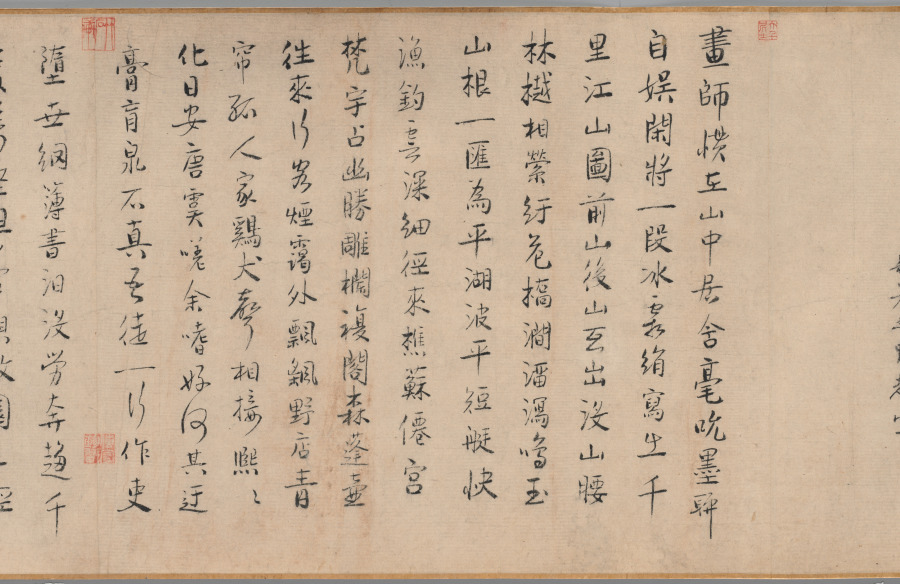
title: Streams and Mountains without End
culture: China, late Northern Song dynasty (960-1127) - Jin dynasty (1115-1234)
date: 1100–1150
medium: handscroll; ink and slight color on silk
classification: Painting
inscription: 9 colophons and 48 seals: 1 colophon, dated 1205, of Wang Wenwei 王文蔚 (dates unknown); 1 colophon, dated 1205, of Li Hui 李惠 (dates unknown); 1 colophon of Weiluo Tian Xie 蔚羅田獬 (dates unknown); 1 colophon, dated 1214, of He Yan 何言 (dates unknown); 1 colophon, dated 1326, of Cao Yuanyong 曹元用 (d. 1329) 1 colophon, dated 1332, of Kangli Zishan 康里子山 (Naonao; 1295-1345); 1 colophon, dated 1336, of Liu Zai 劉載. (dates unknown); 1 colophon, dated 1380, and 4 seals of Yang Mao 楊懋 (1300-after 1380); 4 seals of the Hou family (ca. 1340); 1 colophon of Wang Duo 王鐸 (1592-1652); 4 seals of Zhang Bingqian 張秉乾 (juren of 1729); 8 seals of Liang Qingbiao 梁清標 (1620-1691); 2 seals of the Qianlong emperor (r. 1736-95); 4 seals of the Jiaqing emperor (r. 1796-1820); 3 seals of the Xuantong emperor (r. 1909-11); 2 seals of Ye Gongchuo 葉恭綽 (1881-1968); 17 seals of Zhang Yuan 張爰 (Zhang Daqian 張大千, 1899-1983).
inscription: Colophon 1. Wang Wenwei 王文蔚. Dated third month and third day, 1205, under the reign of Zhangzong of the Jin dynasty. 造物元無心，山川秀氣聚。畫手亦無盡，各出新意度。 誰將妙林泉，淡墨寫縑素。重巒疊嶂間，三兩人家住。 茅舍隔素籬，小橋通細路。溪上數葉舟，雅有物外趣。 嵓崦藏招提，依稀認窗戶。山色四時宜，雲煙自朝暮。 不知塵世中，此景在何處。收拾買山錢，投老好歸去。 泰和乙丑三月三日平原王文蔚謹再拜，書于河東縣署之野趣堂。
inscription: Colophon 2. Li Hui 李惠. The colophon was written three days before the Qingming Festival in 1205. 畫師慣在山中居，含毫吮墨聊自娛。 閑將一段冰霜絹，寫出千里江山圖。 前山後山互出沒，山腰林樾相縈紆。 危橋澗溜瀉鳴玉，山根一匯為平湖。 波平短艇快漁釣，雲深細徑來樵蘇。 僊宮梵宇占幽勝，雕欄複閣森蓬壺。 往來行客煙靄外，飄飄野店青帘孤。 人家雞犬聲相接，熙熙化日安唐宇。 嗟余嗜好何其迂，膏肓泉石真吾徒。 一行作吏墮世網，薄書汨沒勞奔趨。 千巖萬壑但夢想，故園三徑應將蕪。 披圖暫洗黃塵眼，拊膺三嘆空踟躕。 泰和乙丑清明前三日絳臺李惠書于舜城府署之九思堂。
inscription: Colophon 3. Weiluo Tian Xie 蔚羅田獬. 畫工紛紛不可紀，擺脫俗流幾人耳。 夫誰援筆掃鵝溪，一段風煙且千里。 白波青嶂渺無窮，水接山兮山插水。 小橋野店相勾連，古寺樓臺突兀起。 飄然氣象與神俱，但患未明孰姓氏。 郭熙雖老典型存，為問主公無乃是。 此畫世希當寶藏，無與碌碌同一視。 更看卷首數公詩，奇絕清新相表裏。 蔚羅田獬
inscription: Colophon 4. He Yan 何言. Written in 1214. 萬有來自無，一真歸所託。畫師得三昧，胸中幻丘壑。 百態逐墨破，群形隨筆落。地近迹分明，天遙痕隱約。 雲物自吐吞，峯巒非斧鑿。江鄉閴無市，谷關常不鑰。 中有野夫閑，童琴而歩鶴。酒斾出籬懸，漁舟臨岸泊。 澗樹蔽橋樑，巖松迷殿閣。岑疊宿霧重，野曠林煙薄。 危棧接縈紆，亂泉通脈絡。途中人往來，僕馬何羸弱。 怪石虎踡跼，古木龍蟠錯。一幅宜好收，千金非易博。 玉堂閑卷舒，眼界增寥廓。視險尚寛平，見危除慘虐。 氣象溢國華，川澤資廟略。功名業已書，歸去鞭先著。 但知色即空，何是今非昨。飽乎仁智心，箇中無限樂。 貞祐甲戌秋暮，東營何言題。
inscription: Colophon 5. Cao Yuanyong 曹元用 (d. 1329). Dated 1326. 岸擁危橋斷，溪浮小艇斜。 萬山最深處，依約兩三家。 泰定丙寅秋，曹元用題。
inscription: Colophon 6. Kangli Zishan 康里子山 (i.e., Kangli Naonao). The colophon bears a date of 1332. 右溪山圖，意韻蕭灑。一見使人有烟霞之想，真可珍藏。又有□金諸名勝題詩其左。兵火之餘， 殊不易得也。 至順三年暮春之月，康里子山跋。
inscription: Colophon 7. Liu Zai 劉載. 雲拂埜田閑種玉，雨餘巖溜碎傾金。 幾時也結團茆去，麟閤恬然不挂心。 至元二年正月，長安劉載載之謹錄上。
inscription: Colophon 8. Yang Mao 楊懋 (1300–after 1380). 觀此圖，經營位置，筆法高古，山明石潤。其橋梁、路道、樹林、人物、遠近；一一誠得真山水之深趣。非當時名筆有大才者不能至此。不必問其誰何，可為神品。况宋金元三朝名公所跋，尚不能記，想其來尤遠矣。然而物經累變而尚存，是物之有壽者也。余不復再論。文顯其保之。洪武庚申春，八十翁楊懋觀。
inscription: Colophon 9. Wang Duo 王鐸 (1592–1652). 文蓀親翁博雅，文詩鴻暢。舍弟持此喜觀，遂抽管題數語： 山勢委折，筆墨無痕。宋人中如此不多見也。譬之兵家，當是韓白。王鐸。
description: Streams and Mountains without End was a landmark acquisition of 1953, made just a year after Sherman Lee had returned to Cleveland as curator of Oriental art. He acquired it with the intention to provide "a more than adequate foundation for a fine collection of Chinese landscape painting." This impressive work demonstrates the culmination of stylistic developments in Chinese monumental landscape painting following the Northern Song tradition. It represents a journey through a landscape, making it a fitting metaphor for Lee’s journey of discovery and achievement over a lifetime.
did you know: The portrayal of the distant lands is rich with details like pavilions, villages, and human activities.